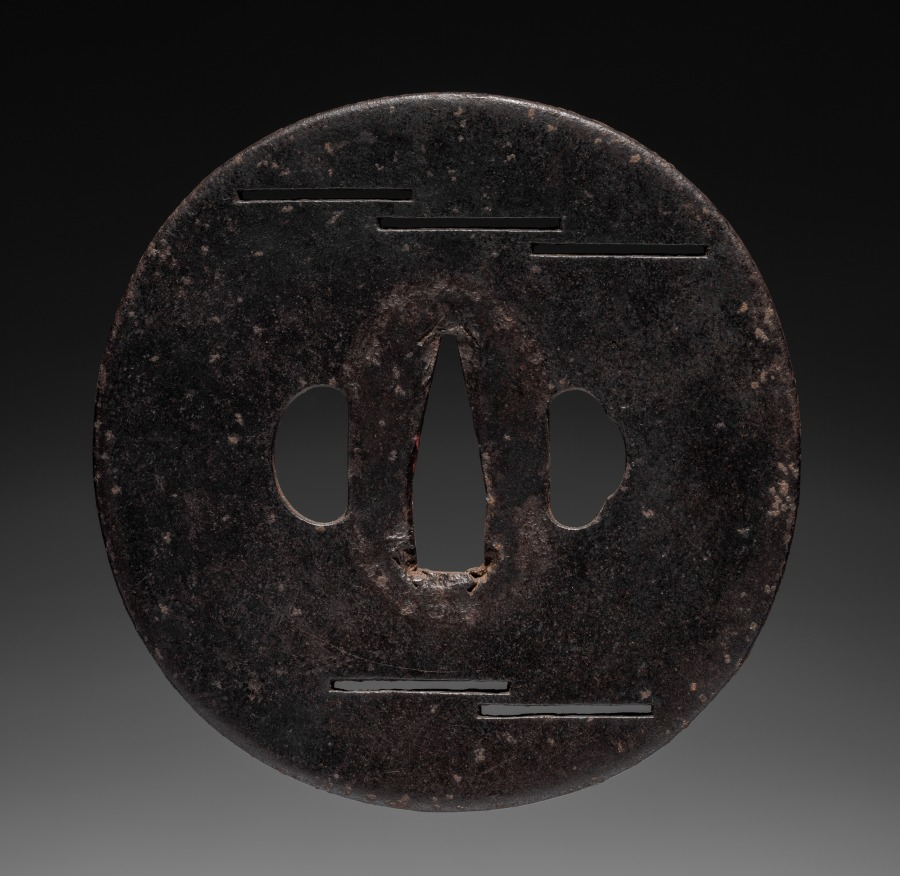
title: Sword Guard (Tsuba)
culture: Japan, possibly Edo period (1615-1868)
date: c. 1615–1868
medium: iron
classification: Arms and Armor